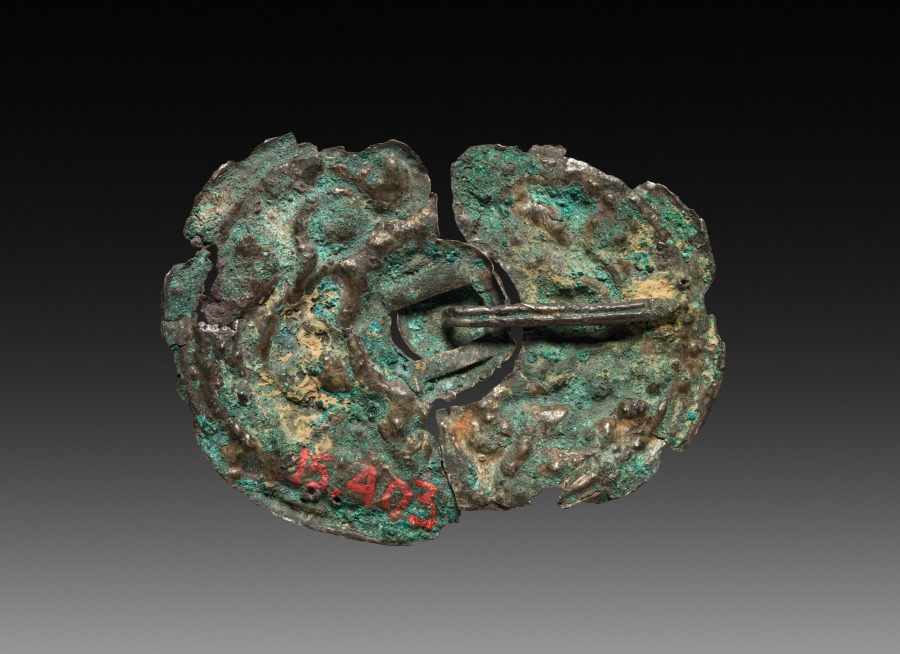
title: Buckle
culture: China, Tang dynasty (618-907)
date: 618–907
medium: silver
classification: Jewelry